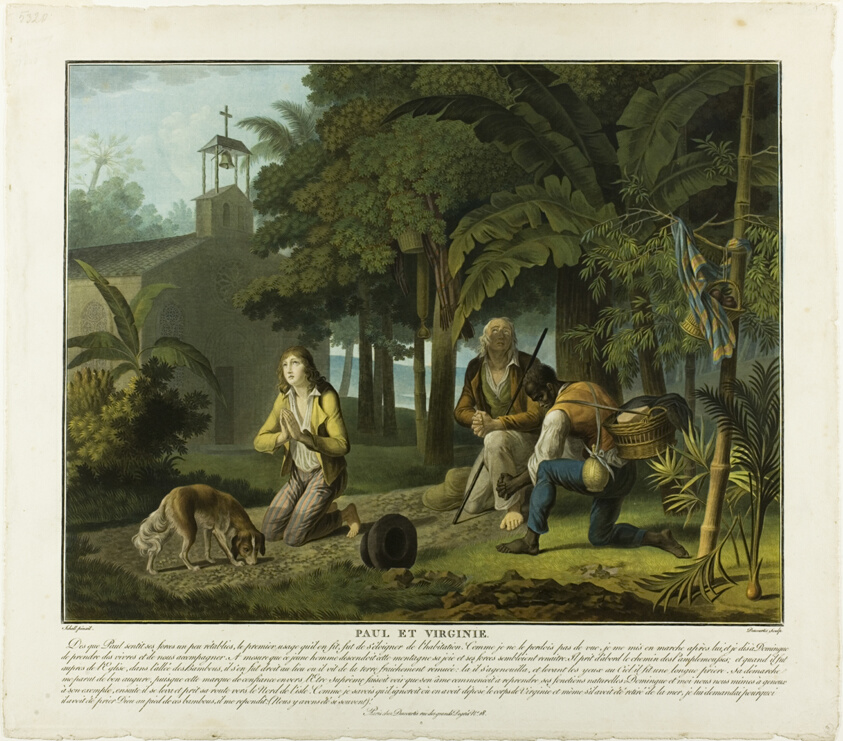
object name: Print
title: The Prayer, plate 6 from Paul et Virginie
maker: Charles-Melchior Descourtis (French, 1753-1820); after Jean Frédéric Schall (French, 1752-1825)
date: 1795-97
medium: Etching and engraving in yellow, blue, red, and black on paper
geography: France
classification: etching; print; prints and drawing